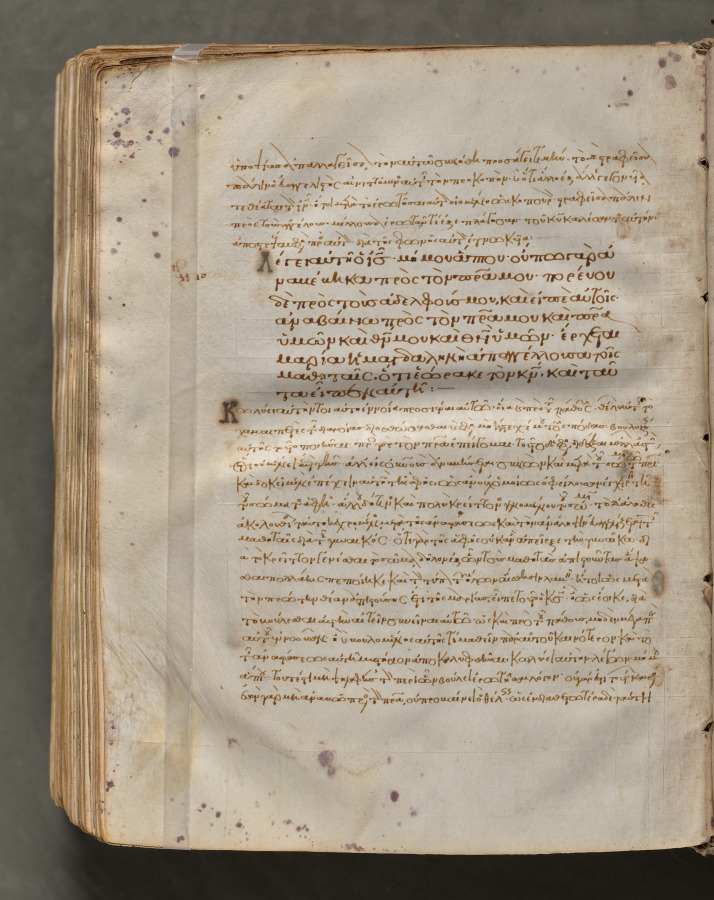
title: Text, folio 419 (recto), from a Gospel Book with Commentaries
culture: Byzantium, Constantinople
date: c. 1000–1100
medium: ink, tempera, and gold on vellum; leather binding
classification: Bound Volume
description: Each of the four gospels in this book opens on a page with brilliantly illuminated borders depicting the author of the text as well as birds—principally peacocks, symbols of the immortality of the soul—and fountains, representing the fountain of life and the salvation of the soul. This volume consists of 428 leaves with texts in Greek. Its level of sophistication suggests that it was probably written and decorated in a monastery in Constantinople.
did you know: Gospel books were carried in procession through Byzantine churches.